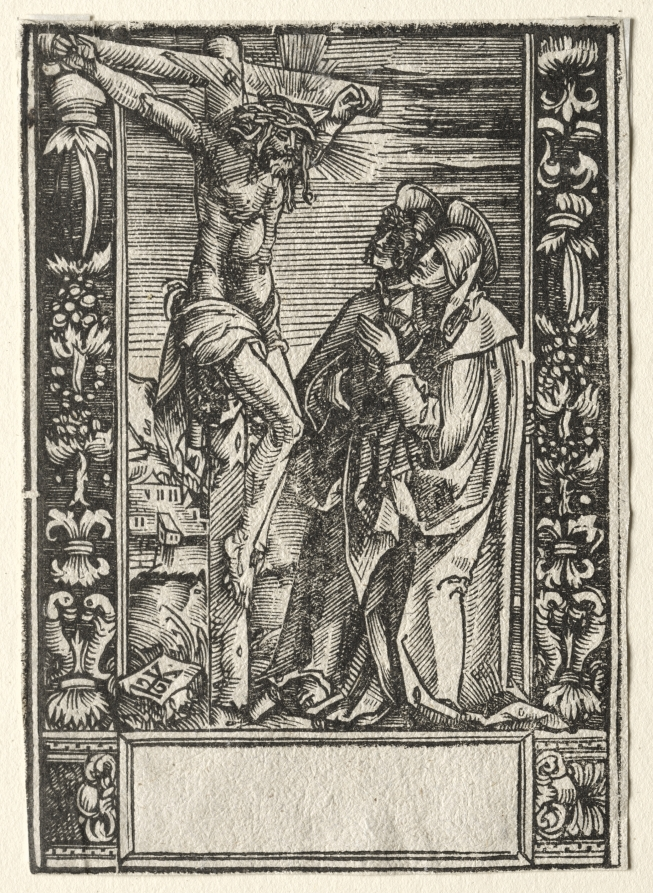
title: St. Mary and St. John Before the Cross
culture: Germany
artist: Hans Springinklee (German, 1540)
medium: woodcut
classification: Print